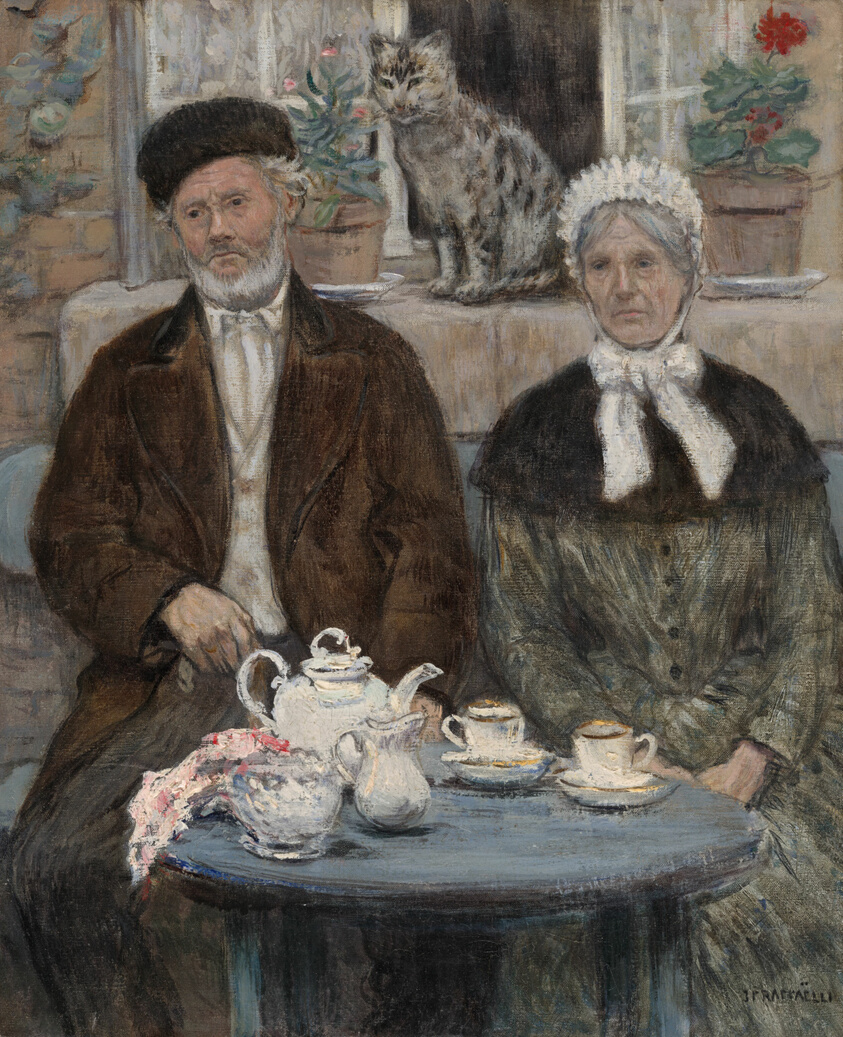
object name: Painting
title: Afternoon Tea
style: nineteenth century, 19th century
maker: Jean François Raffaëlli (French, 1850–1924)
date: c. 1880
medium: Oil on canvas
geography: France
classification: painting; paint; oil paintings (visual works); french; european painting; oil on canvas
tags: tea, woman, window, teapot, tea cup, table, man, hat, flowers, cats, buildings, building, animals